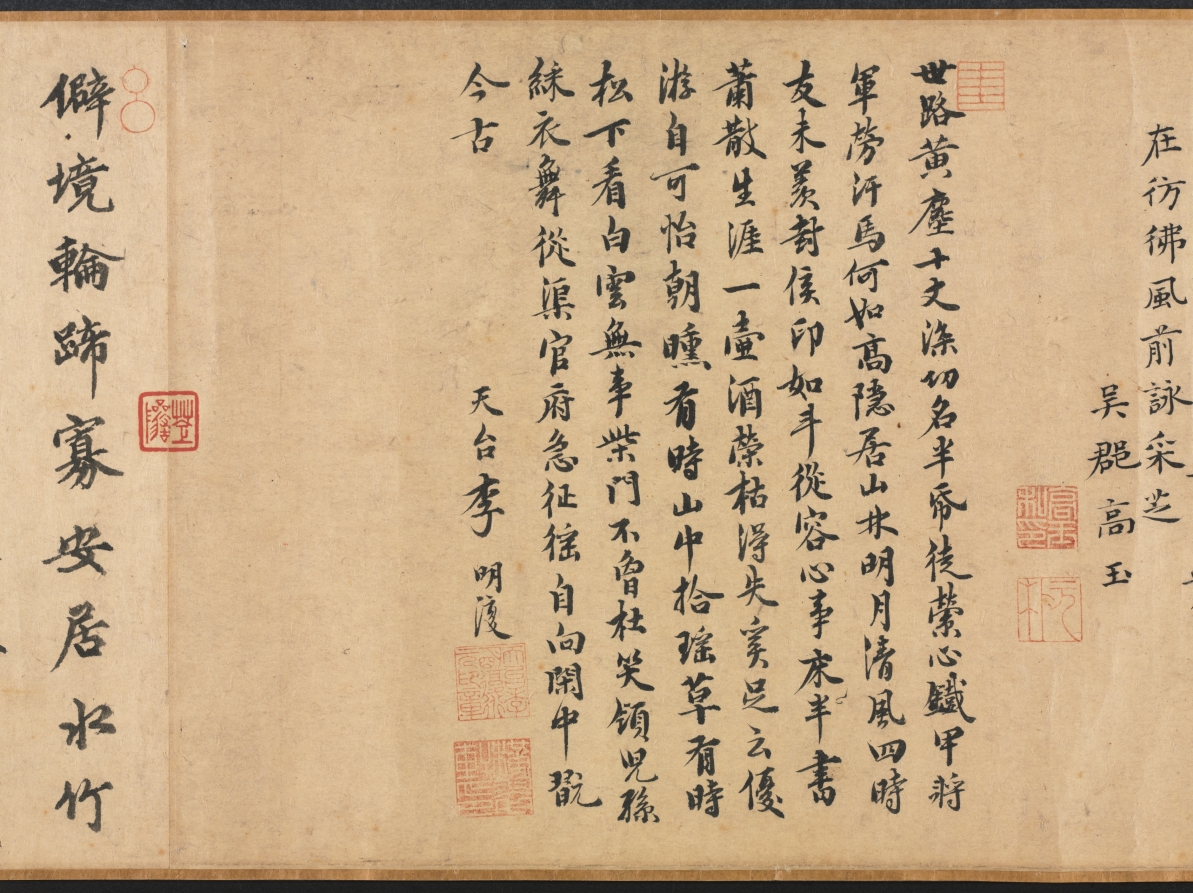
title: Leisure Enough to Spare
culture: China, Yuan dynasty (1271-1368)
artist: Yao Tingmei (Chinese, active mid-1300s)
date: 1360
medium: handscroll, ink on paper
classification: Painting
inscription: 至正廿年春正月_日作此併系鄙語于尾 地偏人遠閉柴關，滿院松陰白晝閒。 眼底風塵渾忘却，坐看流水臥看山。 吳興姚廷美畫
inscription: 23 colophons and 53 seals (dates unavailable for some): 1 colophon, dated 1360, and 2 seals of Yang Weizhen (1296-1370); 1 colophon and 3 seals of Wan Yi; 1 colophon of Zhang Junde; 1 colophon and 3 seals of Angji (act. ca. mid-14th c.); 1 colophon and 1 seal of Xu Shiquan; 1 colophon and 3 seals of Gao Yu; 1 colophon and 2 seals of Li Mingfu; 1 colophon and 2 seals of Lu Lin; 1 colophon and 1 seal of Zhang Qian; 1 colophon of Tao Tangwen; 1 colophon and 1 seal of Wu Yuangui (act. ca. 1300-60); 1 colophon of Bao Jiong; 1 colophon of Wang Zao; 1 colophon and 1 seal of Ma Chuyi; 1 colophon and 1 seal of Lin Yizhuang; 1 colophon and 1 seal of Gu Shunju; 1 colophon and 2 seals of Wang Jing; 1 colophon and 2 seals of Lin Shouchang; 1 colophon and 1 seal of Gao Zhidao; 1 colophon of Lin Xun; 1 colophon, dated 1359, and 2 seals of Meng Weicheng (act. mid-14th c.); 1 colophon and 1 seal of Meng Zhiji (act. mid-l4th c.); 14 seals of Liang Qingbiao 梁清標 (1620-1691); 1 poem dated 1755 and 5 seals of the Qianlong 乾隆 emperor (r. 1736-95); 2 seals of the Jiaqing 嘉慶 emperor (r. 1796-1821); 3 seals of the Xuantong 宣統 emperor (r. 1909-11).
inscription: Title on frontispiece by Zhang Bi 章弼: Signed Gongchen 拱辰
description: Seclusion and leisure—the ideals of the literati, or scholar-gentlemen—are expressed in this mature work by Yao Tingmei. The theme acquired special meaning at a time of the military uprisings near the end of the Yuan dynasty. Dedicated to an ascetic named Du, this work combines painting, calligraphy, and poetry; following the painting are more than 20 poems and essays written by notable scholars, one of whom was the calligrapher Yang Weizhen. It reveals not only the aesthetic taste of the literati but also the practice of contributing artistic and literary works to fulfill social obligations. Yao's painting demonstrates his individual style derived from various ancient masters (Guo Xi, Dong Yuan, and Juran). Yang Weizhen's calligraphy exhibits his bold, vigorous style and his intent to capture the spirit of antiquity in art.